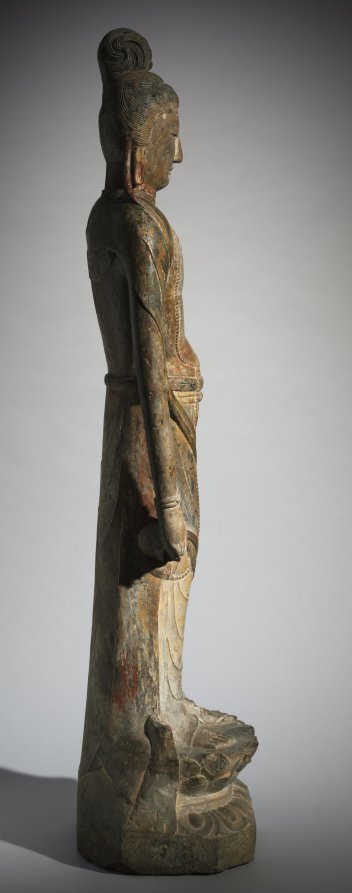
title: Standing Guanyin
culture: China, Tang dynasty (618-907)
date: 700s?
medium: limestone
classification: Sculpture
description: The statue is identified and dated by an inscription to 687. There is a marked restraint and stately elegance of the well-proportioned figure standing in a relaxed pose.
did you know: The statue retains a good deal of old polychrome.